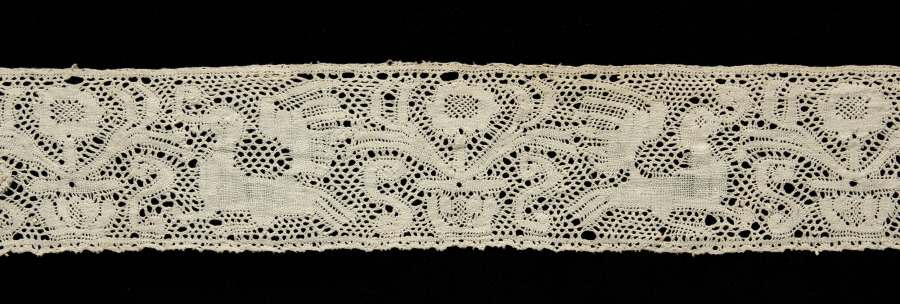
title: Lace Insertion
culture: Italy, Abruzzi, Pescocostanzo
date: 1600s–1700s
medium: Bobbin lace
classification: Lace